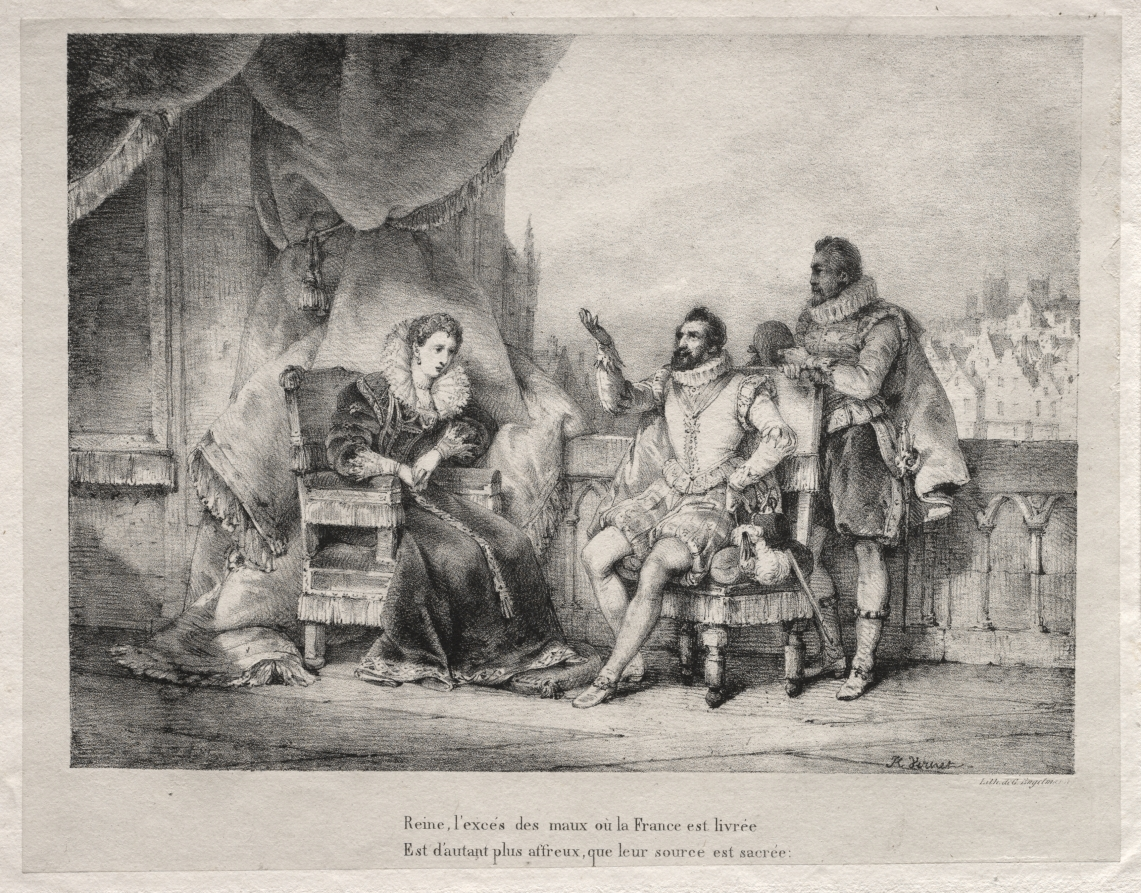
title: Henri IV with Queen Elizabeth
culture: France, 19th century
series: Voltaire's La Henriade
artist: Horace Vernet (French, 1789–1863)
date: 1822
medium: lithograph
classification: Print